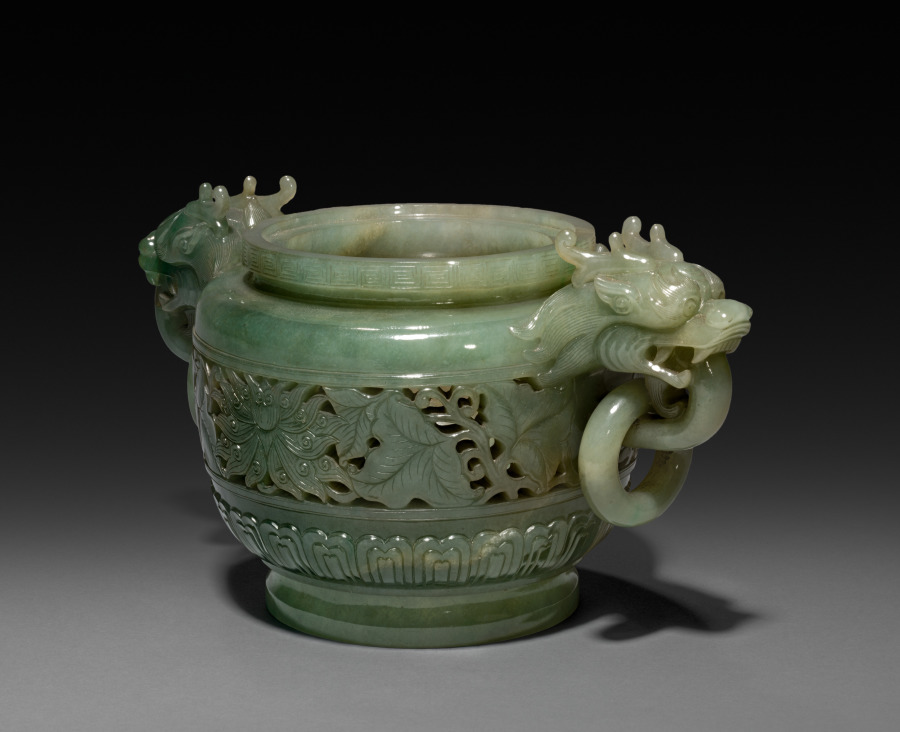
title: Koro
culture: China, Qing dynasty (1644–1911), Qianlong reign (1736–95)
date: 1736–95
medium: jade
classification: Jade